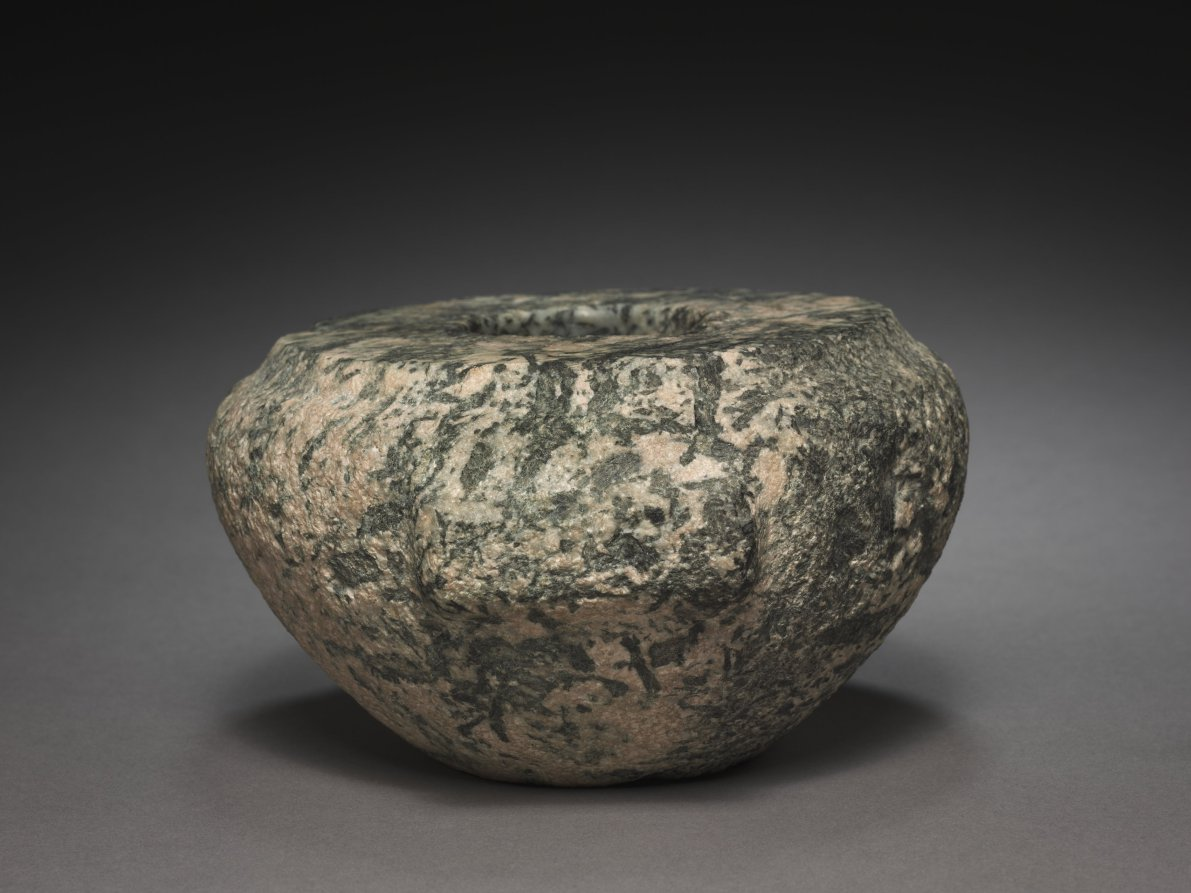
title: Squat Dummy Jar with Lug Handles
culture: Egypt, probably Saqqara, north of the Step Pyramid, tomb 2347, excavations of J. E. Quibell, 1910-1911, Early Dynastic (2950–2647 BCE), Dynasties 2–3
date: 2700–2573 BCE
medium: hornblende diorite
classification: Vessels